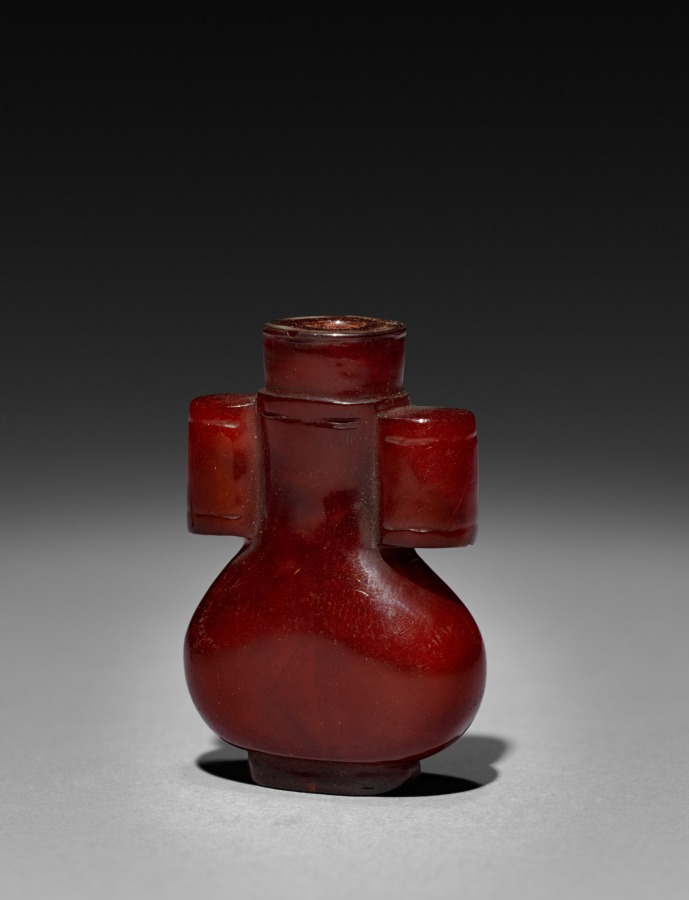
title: Snuff Bottle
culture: China, Qing dynasty (1644-1911)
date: 1644–1911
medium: glass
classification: Glass